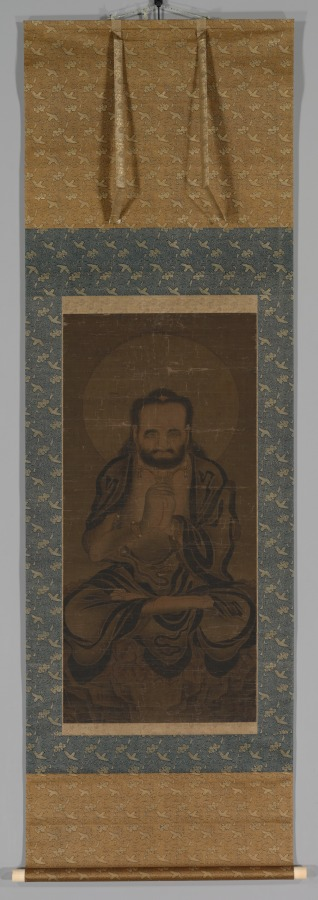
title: Sakyamuni Buddha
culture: China, Yuan dynasty (1271-1368)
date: 1300s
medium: Hanging scroll; ink and color on silk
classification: Painting